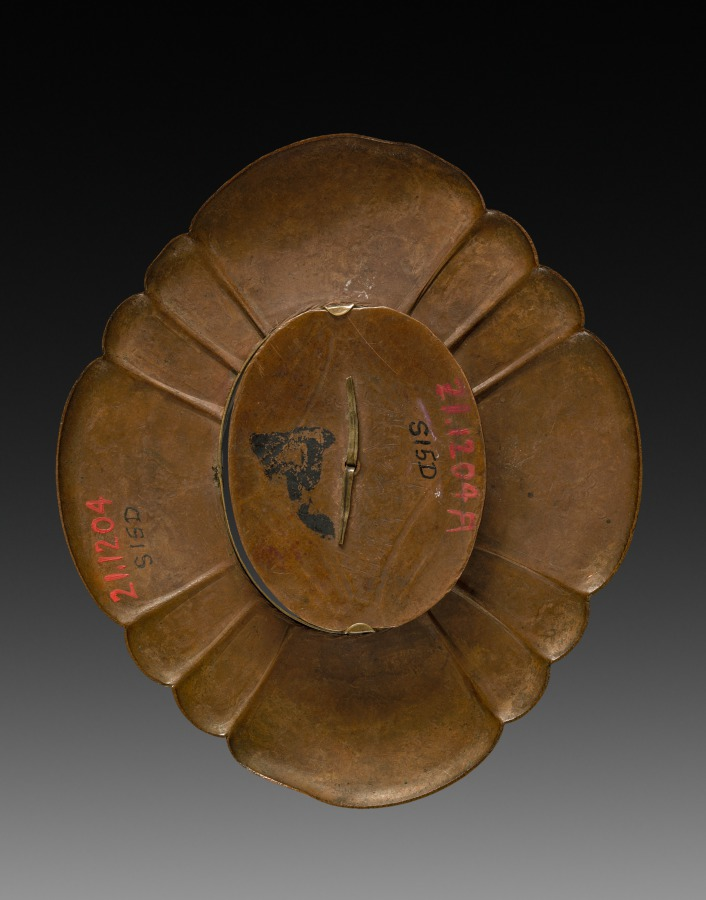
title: Door Pull (Hikite)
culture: Japan, Edo period (1615–1868)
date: early to mid-1800s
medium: bronze (?)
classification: Metalwork